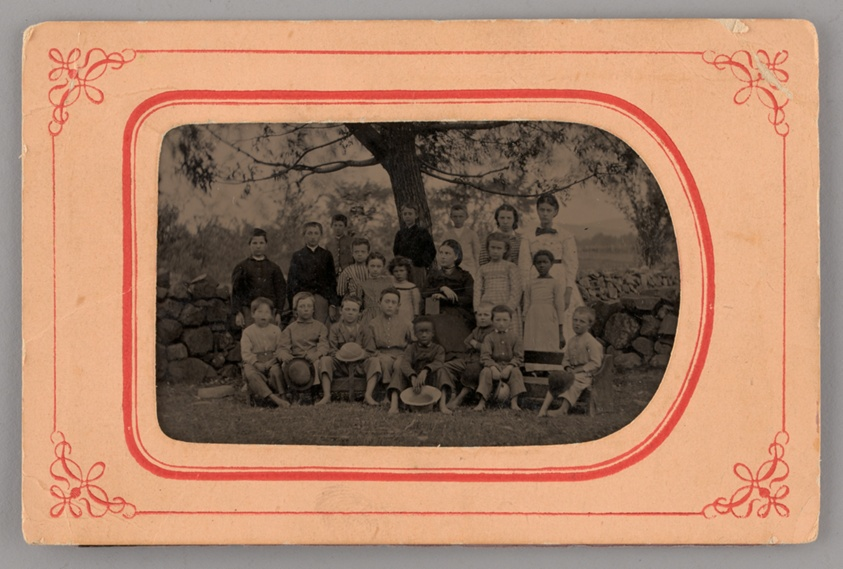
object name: Photograph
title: Untitled (Group Portrait of Children)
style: 19th century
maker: Unknown maker; American, 19th century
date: 1875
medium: Tintype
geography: United States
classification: portrait; photograph; photographic process; photography; portrait; tintype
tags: lundberg collection, portraits, portraits: multiple subjects, portraits: child subject, portrait, children